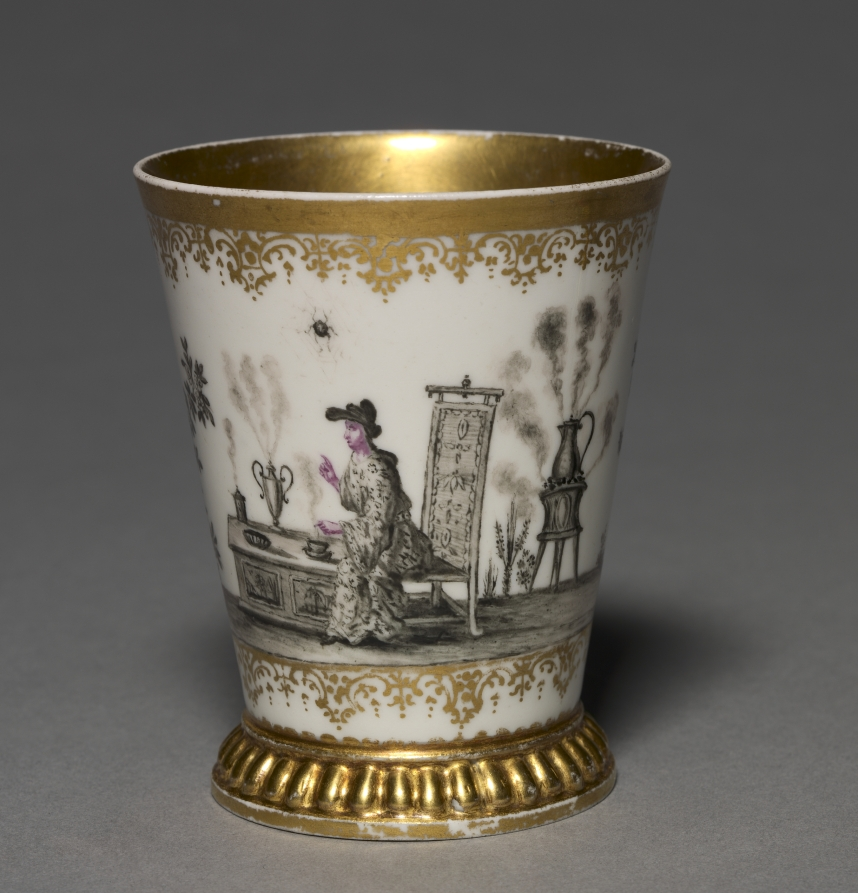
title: Beaker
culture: Germany, Meissen, early 18th century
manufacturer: Meissen Porcelain Factory (German, est. c. 1710)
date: before 1720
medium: porcelain, interior gilded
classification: Ceramic